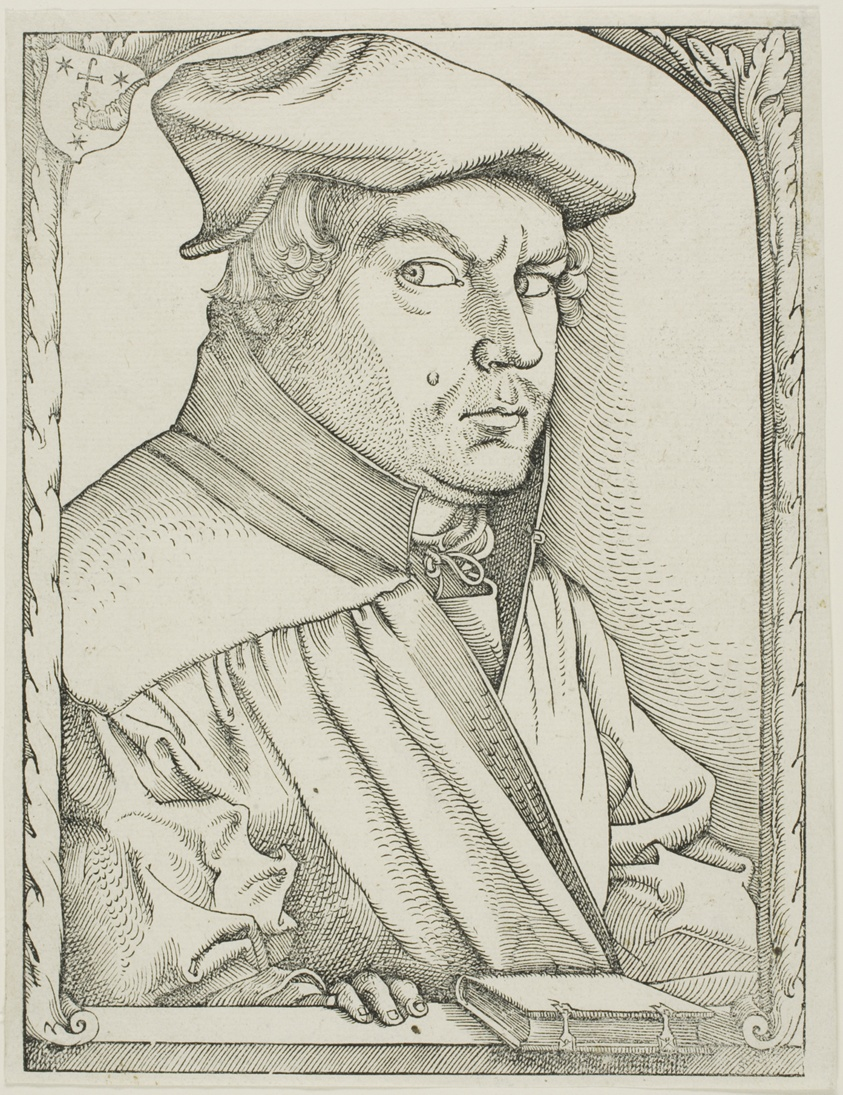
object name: Print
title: Caspar Hedio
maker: Hans Baldung Grien (German, 1484/85-1545)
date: 1543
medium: Woodcut in black on ivory laid paper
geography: Germany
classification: woodcut; print; prints and drawing